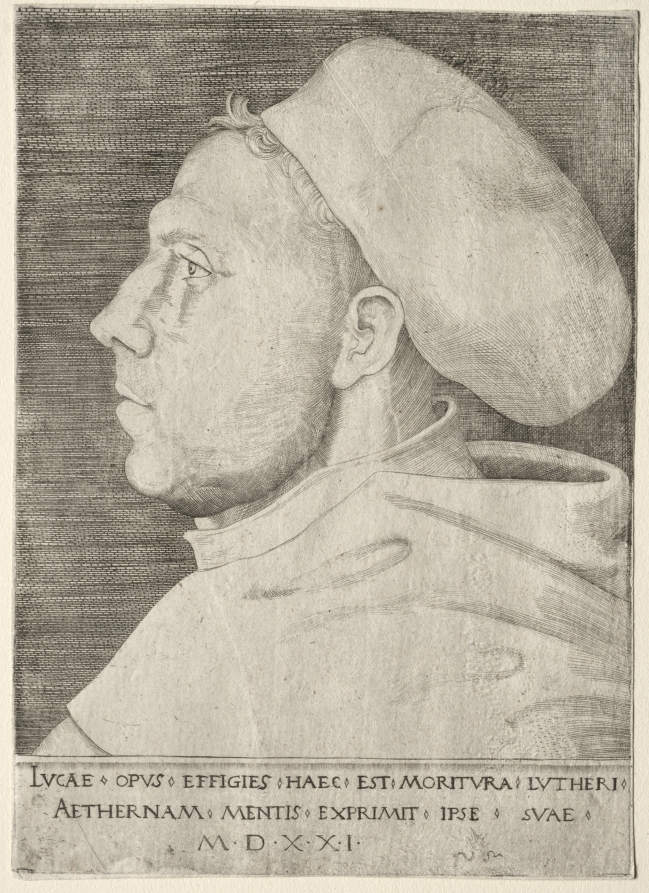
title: Martin Luther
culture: Germany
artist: Lucas Cranach (German, 1472–1553)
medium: engraving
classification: Print